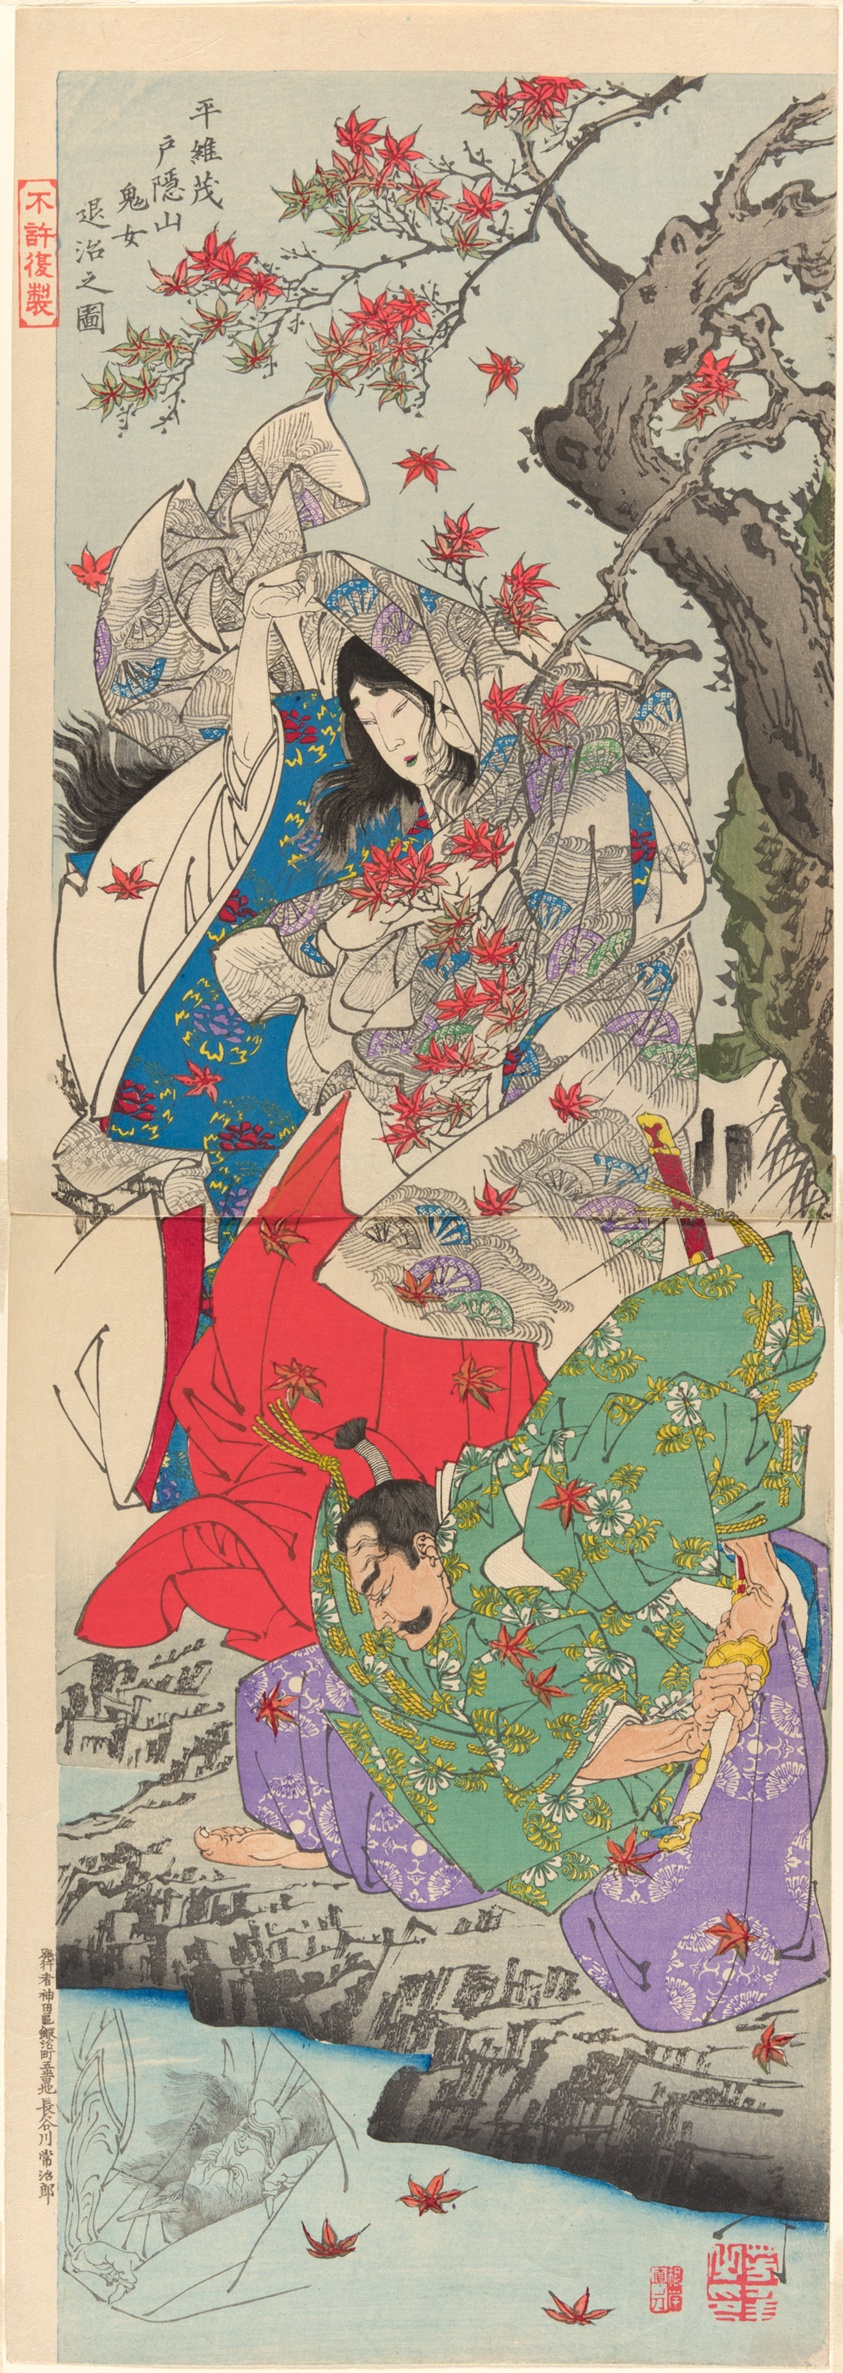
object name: Print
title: Taira Koremochi Conquering the Devil Woman on Mount Togakushi (Taira no Koremochi Togakushiyama kijo taiji no zu)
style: Japanese (culture or style)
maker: Tsukioka Yoshitoshi (Japanese, 1839–1892)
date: 1887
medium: Color woodblock prints; oban diptych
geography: Japan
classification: woodblock print; print; asian art